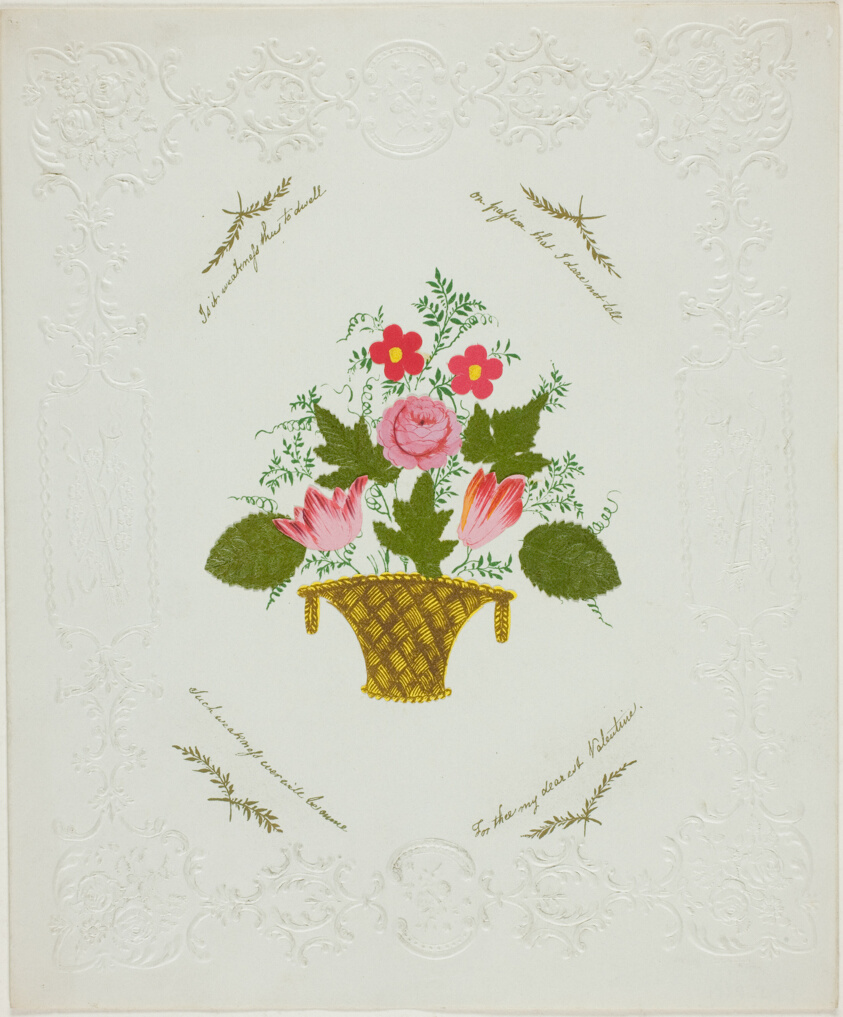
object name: Drawing and Watercolor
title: Is it Weakness thus to Dwell (valentine)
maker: George Kershaw (English, 19th century)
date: c. 1840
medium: Collaged elements with watercolor on embossed off-white wove paper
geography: England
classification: prints and drawing; paper